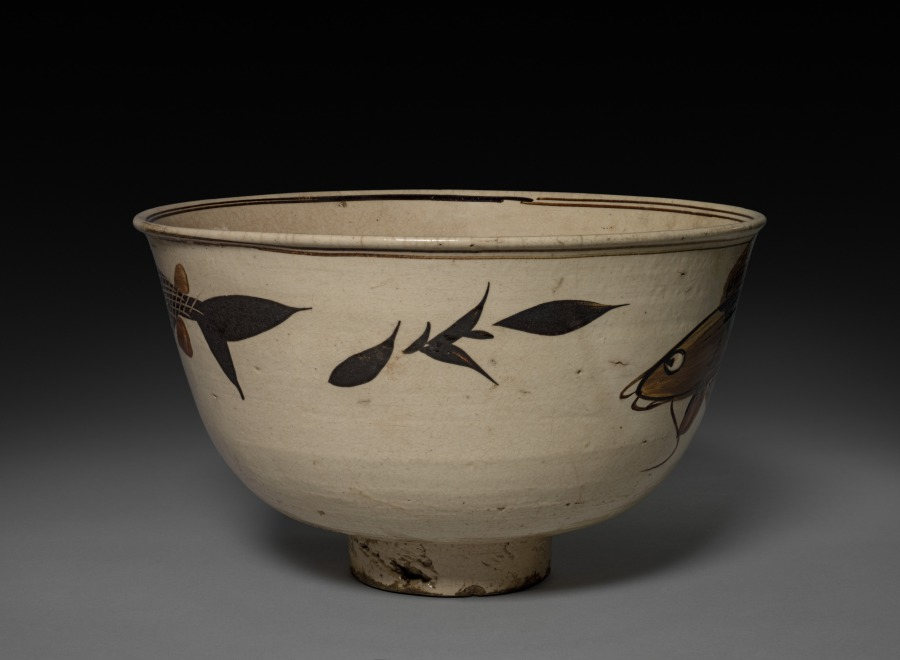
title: Bowl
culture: China, Ming dynasty (1368–1644)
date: 1368–1644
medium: stoneware, Cizhou ware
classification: Ceramic